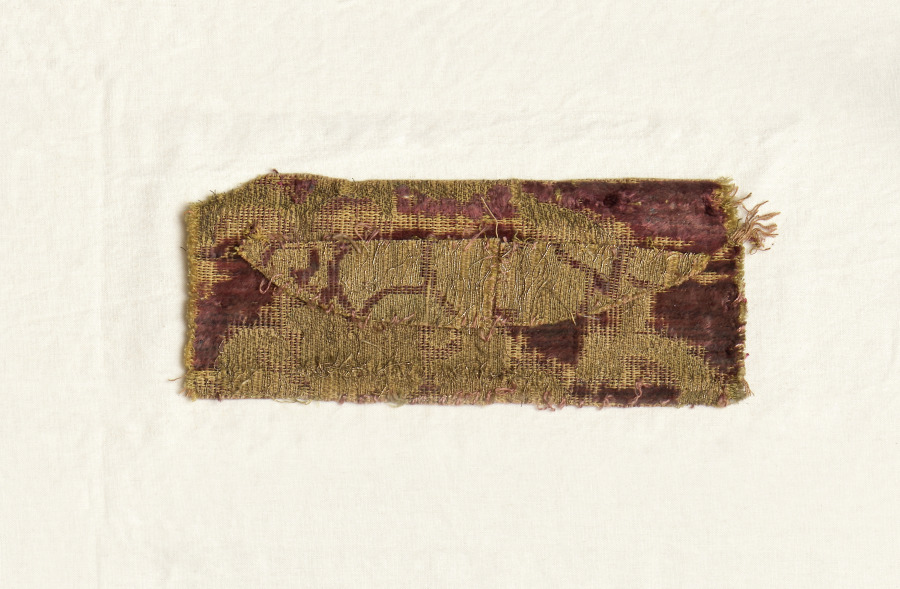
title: Fragments from Chasuble Front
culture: Italy, early 16th century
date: early 1500s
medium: velvet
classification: Velvet